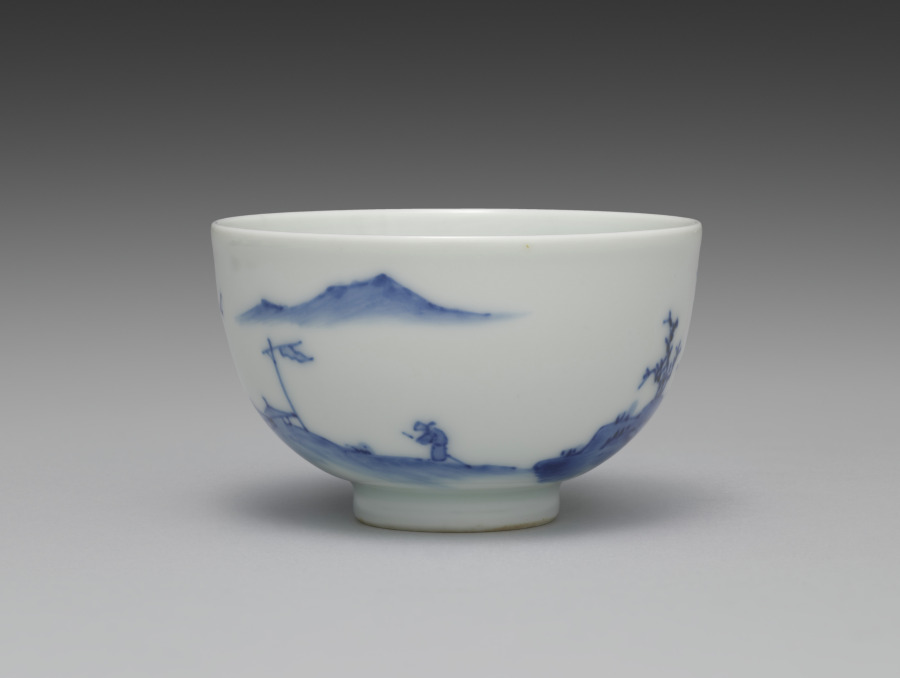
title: Teacup from Tea Set with Chinese Landscape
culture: Japan, Meiji period (1868–1912)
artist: Seifū Yohei III (Japanese, 1851–1914)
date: 1893–1914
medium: Porcelain with underglaze blue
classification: Ceramic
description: The theme of this sencha tea set is the Chinese scholar-recluse in an idyllic landscape. Each of the five teacups has a landscape with an architectural structure and some human activity. This tea set has a side-handled pot called a kyūsu, used for steeping, straining, and serving tea. Unlike some others, this set also has a yuzamashi, a container used to cool boiled water to just the right temperature for the best flavor when steeping. Seifū Yohei III’s painting teacher, Tanomura Chokunyū (1814–1907), made a visual record of famous sencha events that shows how these kinds of porcelains fit with objects such as a stove and kettle to form a complete set of utensils for tea preparation, and with ensembles of decorative objects meant to inspire creativity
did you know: This cup has a man walking toward a group of three pavilions announced with a banner hanging from a tall post; beyond this are two large deciduous trees sheltering a stand of small conifers. Across the water from this site is another man sitting on the bank fishing with a large woven basket for his catch beside him.